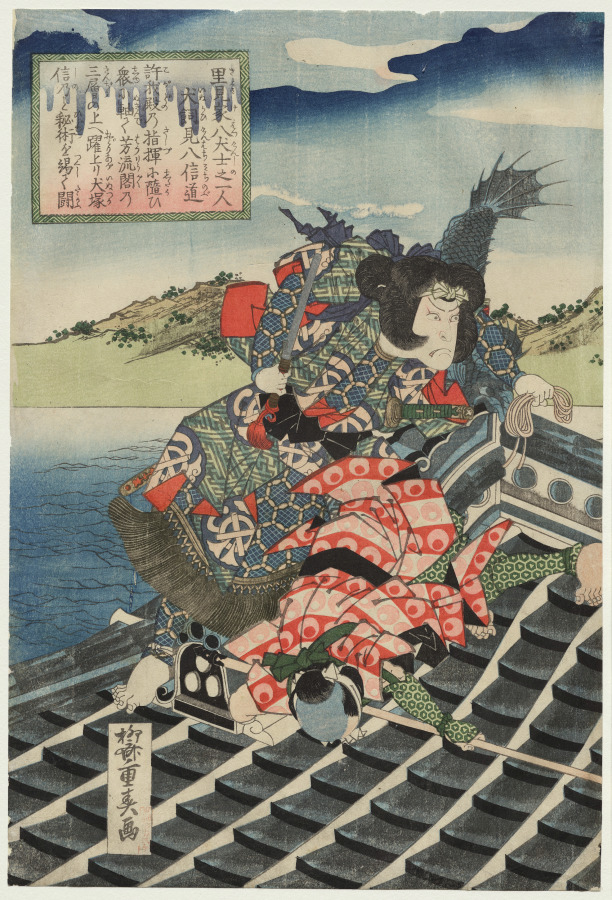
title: Arashi Rikan II as Inuzuka Shino Moritaka and Nakamura Utaemon III as Inukai Kenpachi Michinobu Battling (from the series The Eight Heroes of the Satomi Clan)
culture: Japan, Edo period (1615–1868)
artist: Ryūsai Shigeharu (Japanese)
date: 1834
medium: color woodblock print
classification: Print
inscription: Signature: Ryusai Shigeharu ga Engraver: Yama saiku Kasuke